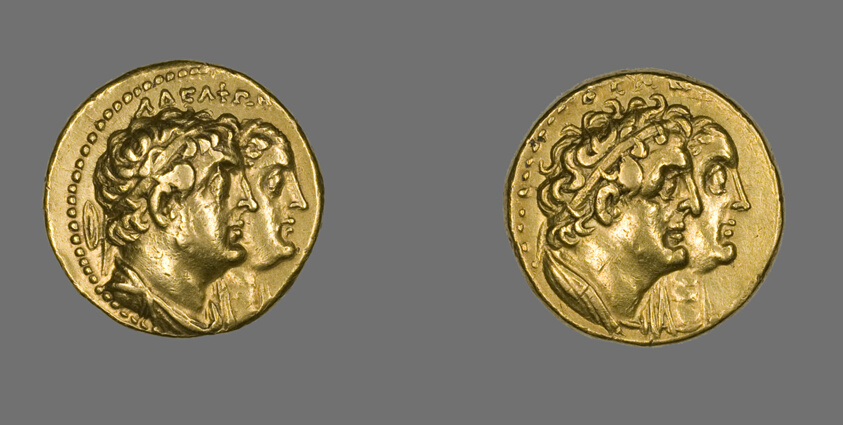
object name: Coin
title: Tetradrachm (Coin) Portraying King Ptolemy II Philadelphos and Queen Arsinoe II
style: ptolemaic, greco-roman (egyptian), ancient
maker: Greek, Ptolemaic; Egypt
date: After 270 BCE, issued by King Ptolemy II, reign of Ptolemy II and Arsinoe II, 285–247 BCE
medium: Gold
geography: Egypt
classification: coin; ancient art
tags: portraits